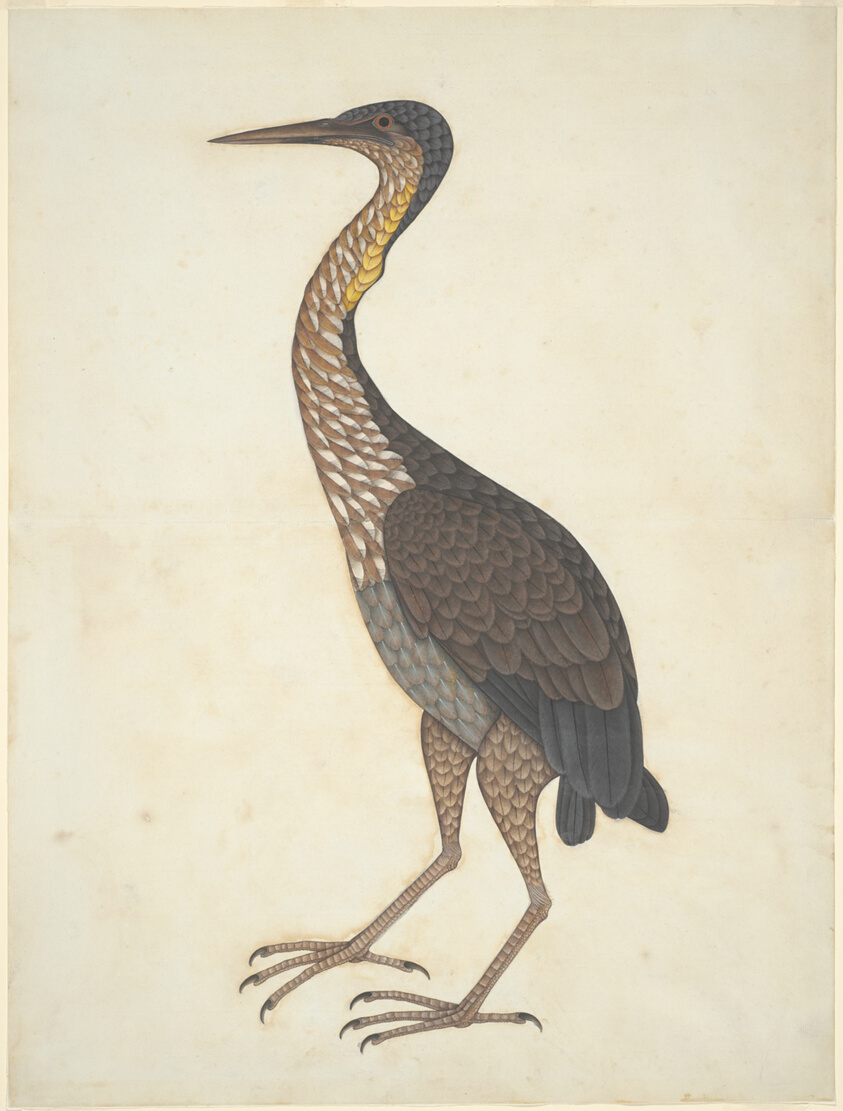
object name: Painting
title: Purple Heron (Ardea purpurea)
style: South Asian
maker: India; West Bengal, Kolkata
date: Company School, c. 1780-1820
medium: Watercolor on watermarked paper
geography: India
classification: watercolor; painting; asian art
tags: animals